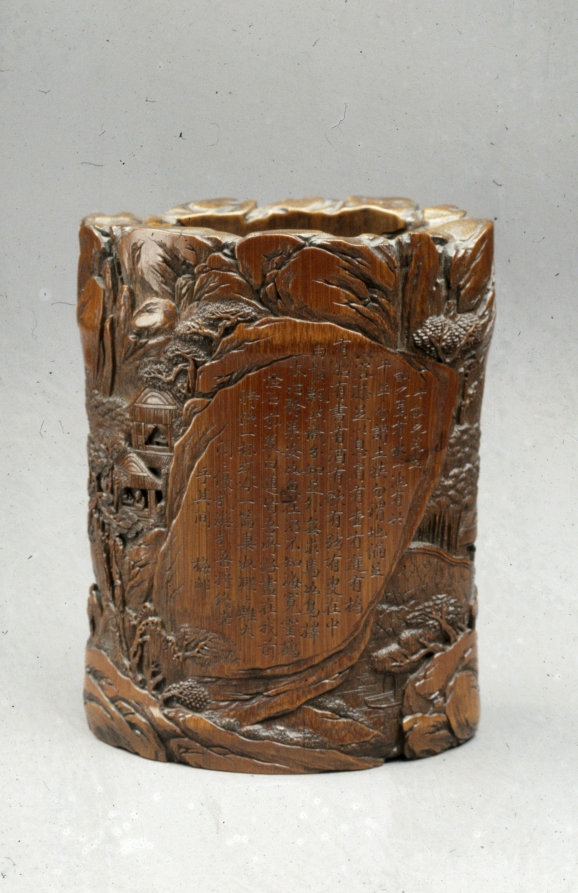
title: Brush Holder with Figures in Landscape and Poetic Inscription by Wang Meilin from Jiading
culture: China, Qing dynasty (1644-1911), Daoguang reign (1821-50)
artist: Wang Meilin (Chinese, active c. 1825)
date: 1800s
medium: carved bamboo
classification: Wood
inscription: A ten-acre [home], a five-acre yard with a water pool, and a thousand bamboos. Don’t say the field is narrow, or the location remote. It is enough to accommodate the knee and rest the shoulder. It has a hall and a yard, a bridge and a boat. It has books and wine, songs and string [instruments]. An old man in the midst of it, his white beard flowing. [He] is moderate and satisfied, has no demands and needs. Like a bird he chooses a branch, builds a nest, and rests at ease. Like a fish in a swamp, that does not know how wide the ocean is. . . . All I like, lies before me. I drink a cup of wine from time to time, recite a [poem], wife and children play, chicken and dogs are at leisure, and I will grow old here.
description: This bamboo brush holder shows a scholar inside a mountain retreat under trees. On its back side, a cliff inscribed with a text by the Tang poet Bai Juyi (772–846) describes the carefree life of a scholar among family and servants in the countryside. The text in cursive script style calligraphy (xingshu) says: A ten-acre [home], a five-acre yard with a water pool, and a thousand bamboos. Don’t say the field is narrow, or the location remote. It is enough to accommodate the knee and rest the shoulder. It has a hall and a yard, a bridge and a boat. It has books and wine, songs and string [instruments]. An old man in the midst of it, his white beard flowing. [He] is moderate and satisfied, has no demands and needs. Like a bird he chooses a branch, builds a nest, and rests at ease. Like a fish in a swamp, that does not know how wide the ocean is. . . . All I like, lies before me. I drink a cup of wine from time to time, recite a [poem], wife and children play, chicken and dogs are at leisure, and I will grow old here.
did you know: Bamboo was considered a humble material that suited the Confucian ideals of frugality and modesty.